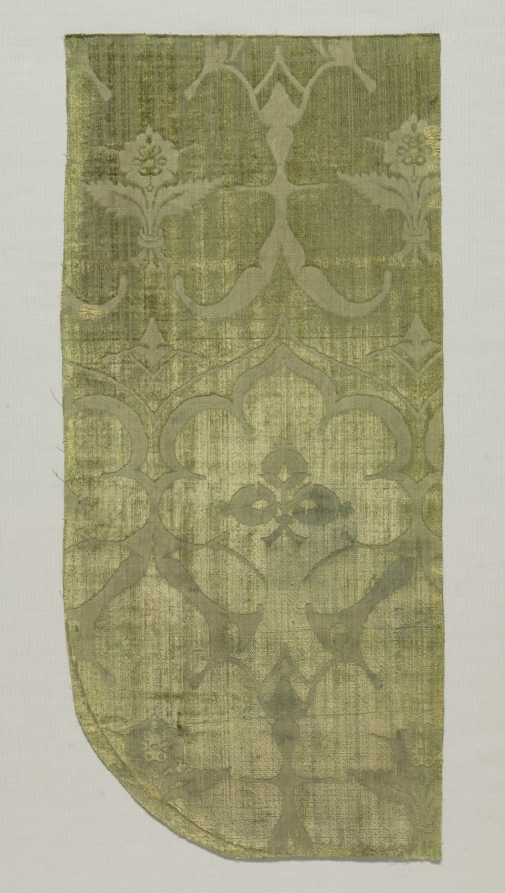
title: Fragment, probably from a Chasuble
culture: Italy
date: 1400s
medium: Silk with cut and voided velvet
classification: Velvet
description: Luxurious velvet fabrics were woven in several different grades based on the quality and quantity of the raw materials. Those with extensive gold thread and plush silk pile were the most luxurious. This green velvet is of a lower grade. The popular 15th-century pattern of five-lobed palmettes displaying pomegranates or blossoms is arranged in staggered rows. Velvet pile was omitted in areas to create the pattern, known as "voided" velvet. Since projecting pile required quantities of silk thread, voided velvet was less expensive to manufacture than solid-pile velvet or brocaded velvet.